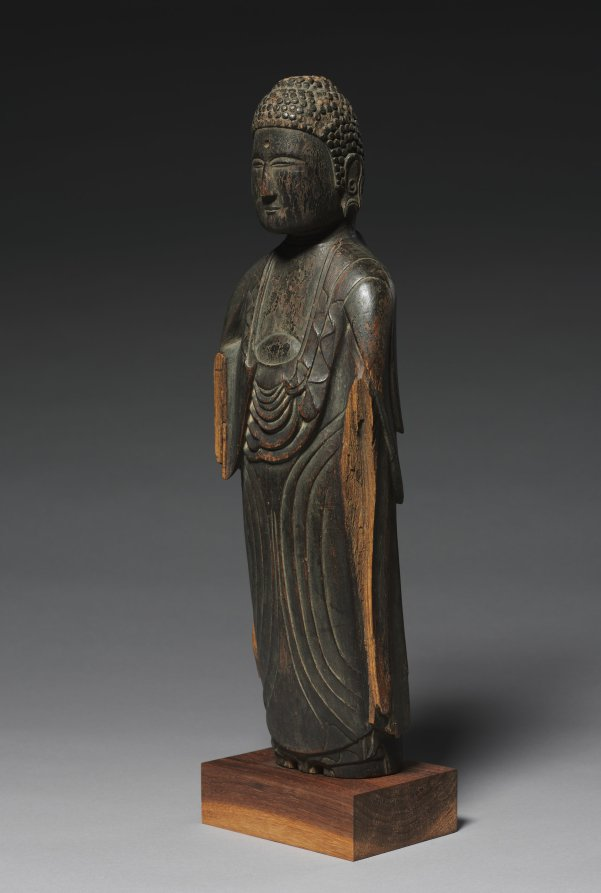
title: Sakyamuni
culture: Korea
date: 1900s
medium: wood with traces of black lacquer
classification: Sculpture